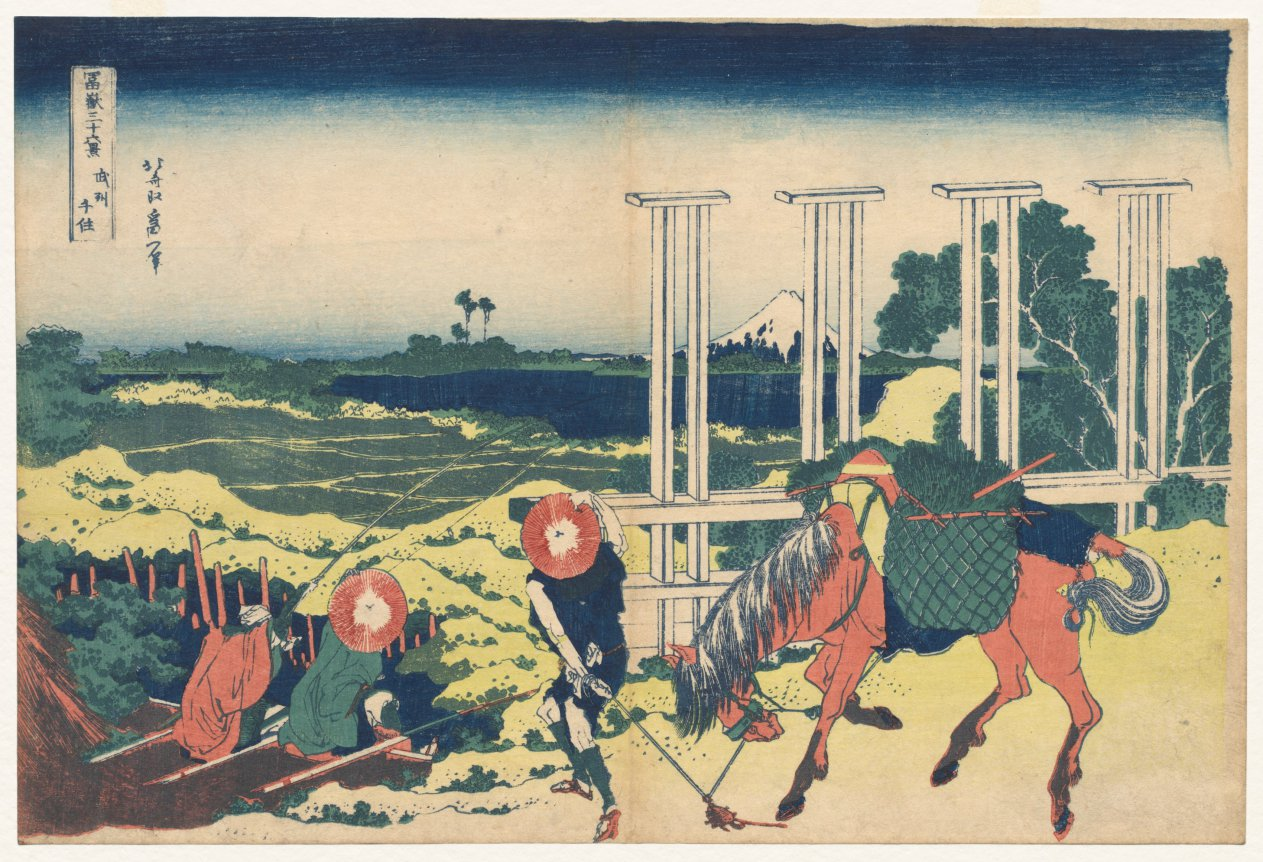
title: The Weir at Senju in Musashi Province (from the series Thirty-Six Views of Mt. Fuji)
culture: Japan, Edo period (1615–1868)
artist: Katsushika Hokusai (Japanese, 1760–1849)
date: early 1830s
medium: color woodblock print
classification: Print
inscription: Signature: Hokusai aratame Iitsu hitsu Publisher: Nishimuraya Yohachi